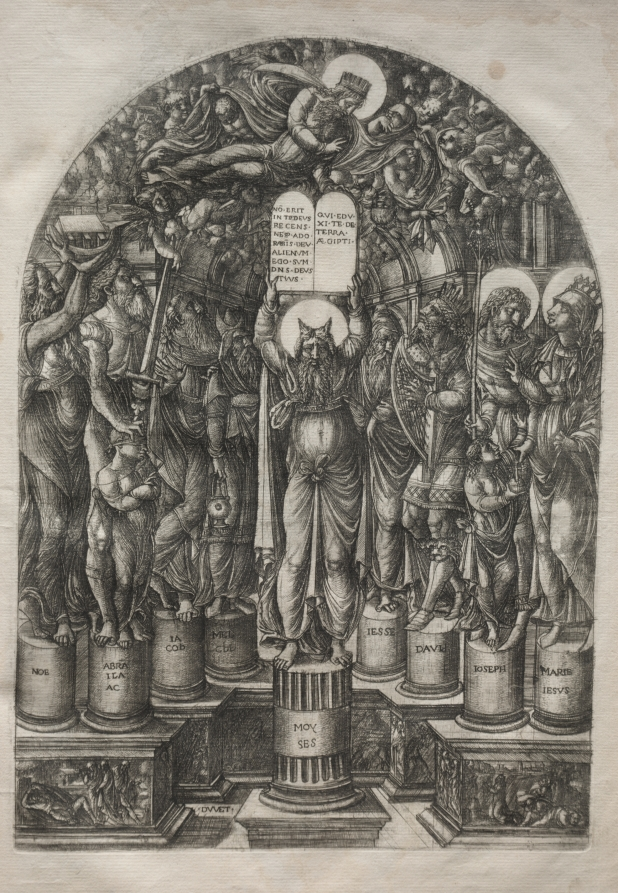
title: Moses Surrounded by the Patriarchs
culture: France, 16th century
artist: Jean Duvet (French, 1485–1561)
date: before 1561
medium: engraving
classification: Print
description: This print is part of a bound volume of works illustrating the a narrative of the Apocalypse, taken from the Revelation of Saint John in the Bible. The 23 engravings in the series occupied the artist for a number of years and represent his greatest artistic achievement. The museum's volume is one of only seven known complete sets. Jean Duvet was one of the first major printmakers in France and one of the most original artists of the 1500s. Although he worked mostly in the provincial city of Langres, he became aware of Italian art through the circulation of prints—notably those of Marcantonio Raimondi. His solidly modeled human figures reflect the influence of the Italian High Renaissance. Duvet, however, developed an idiosyncratic, highly artificial style with crowded compositions that ignore rational space in favor of ornamental surface patterns.